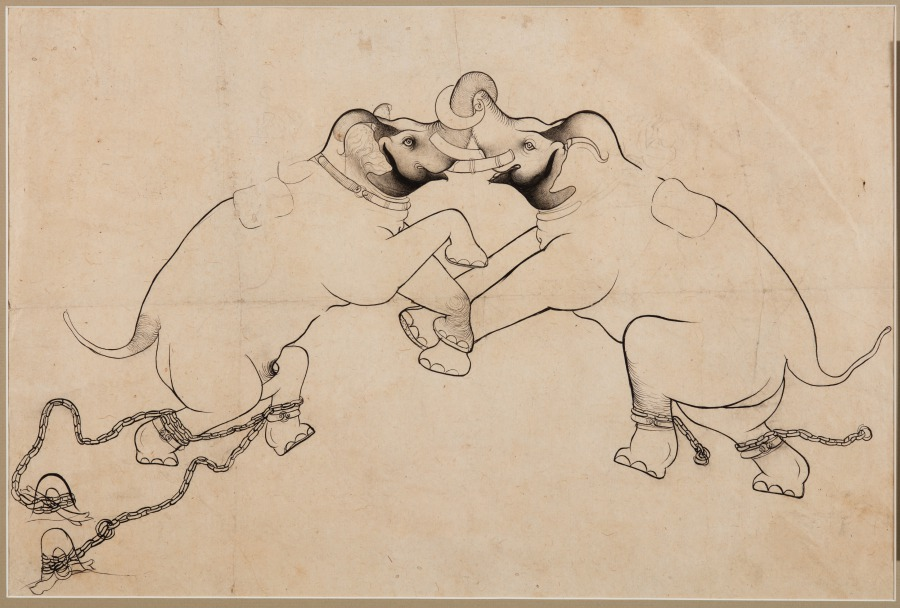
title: Two Elephants in Combat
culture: Northwestern India, Rajasthan, Rajput Kingdom of Kota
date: 1700–1730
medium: ink on paper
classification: Painting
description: Elephants were prized possessions for the Rajput Maharajas of Rajasthan. Not only were elephants a decisive factor in the battlefield, but also represented the owner’s material wealth. Elephant fights were a favorite amusement of the Maharaja, and certain elephants were trained specially for this purpose. The drawing depicts two elephants in combat with each other with their trunks intertwined.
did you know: The elephants have been shackled at their back feet to keep them from running free.